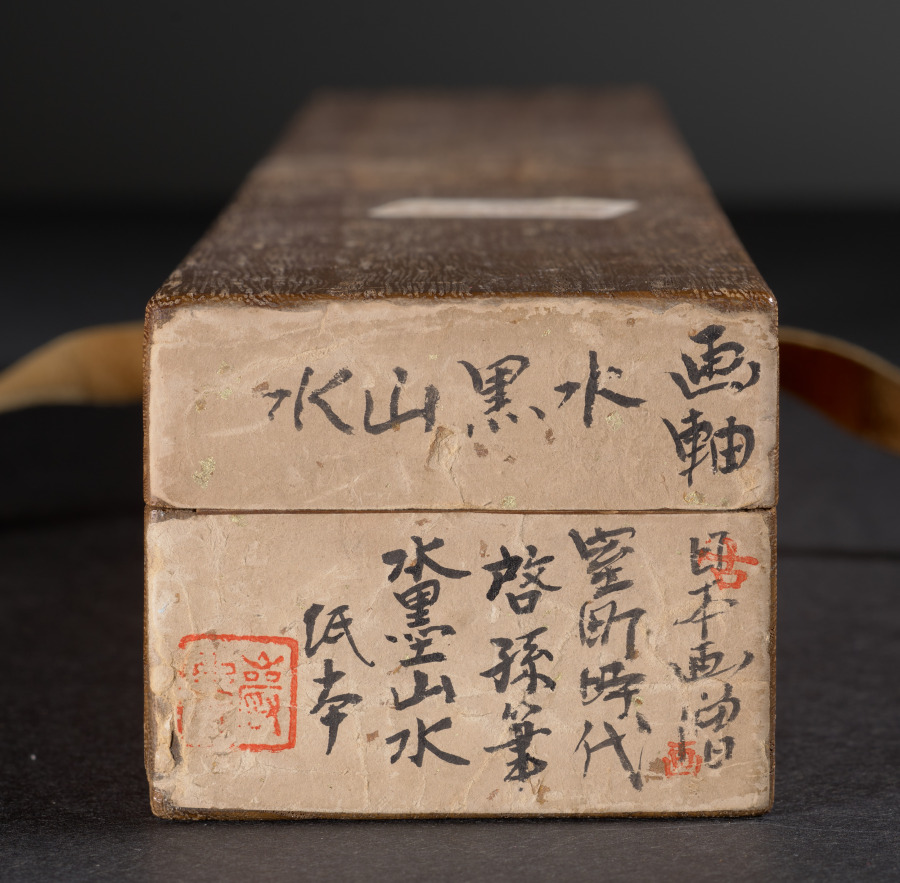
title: Coastal Landscape in the Haboku Style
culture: Japan, Muromachi period (1392–1573)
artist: Keison (Japanese, active late 15th to early 16th century)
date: late 1400s–early 1500s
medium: hanging scroll, ink on paper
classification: Painting